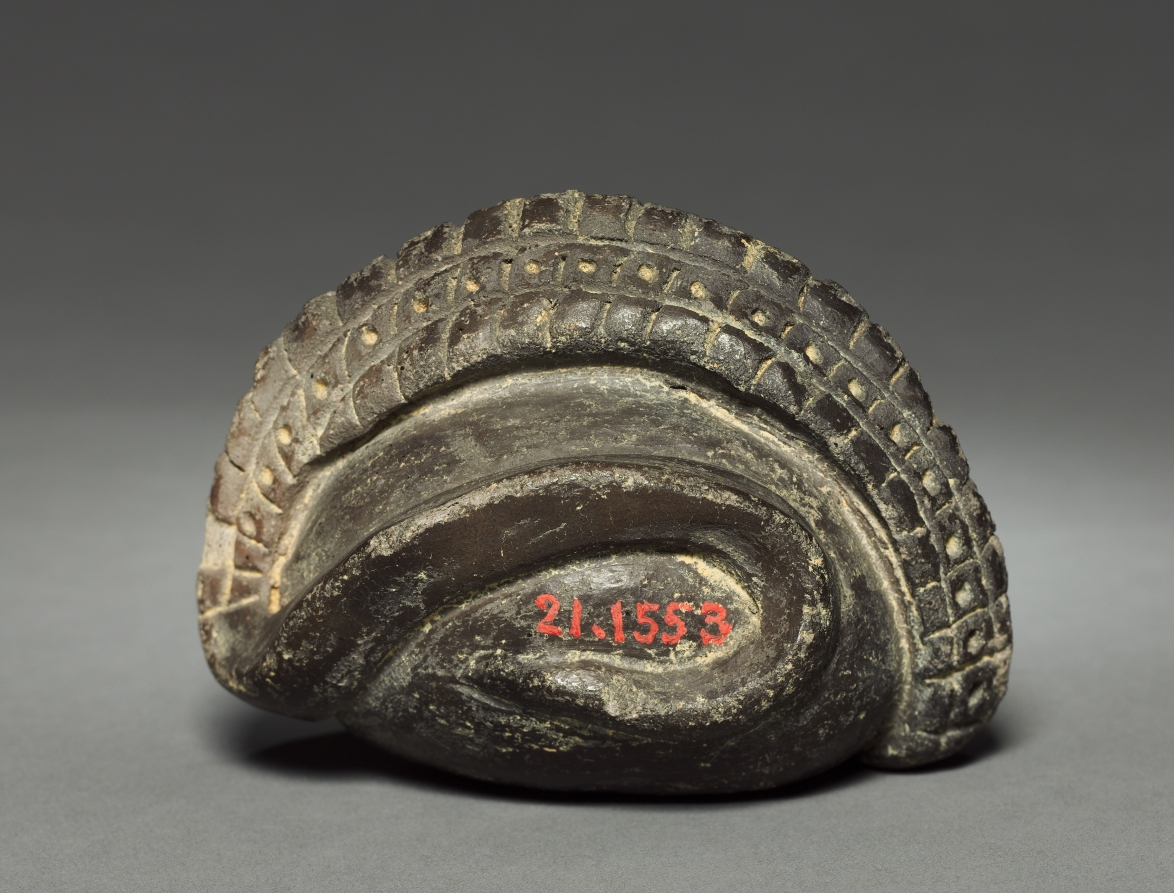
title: Coiled Snake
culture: Colombia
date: before 1921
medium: pottery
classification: Ceramic